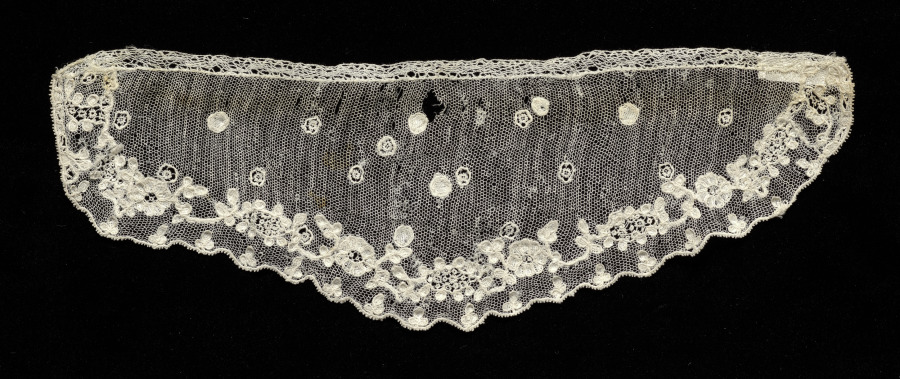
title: Lace Cuff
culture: Italy, Burano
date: 1760–99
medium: Linen: needle lace (Burano Point)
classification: Lace